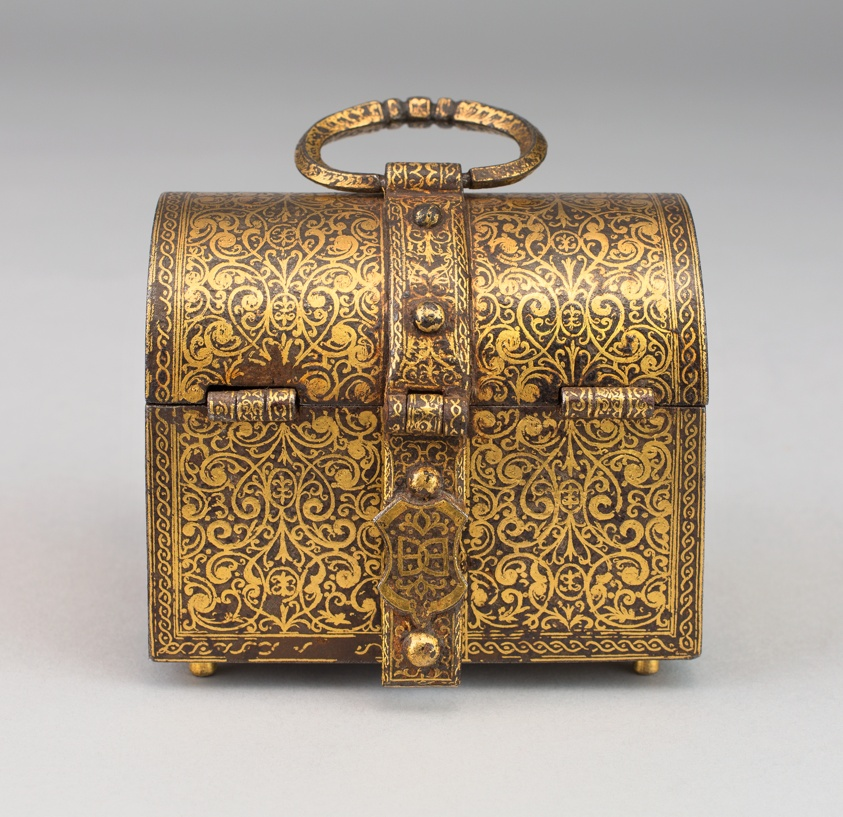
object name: Metalwork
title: Casket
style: Renaissance, 16th Century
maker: French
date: 19th century in the 16th century style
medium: Steel and gold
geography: France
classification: casket; gold; decorative arts; european decorative arts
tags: travel, casket